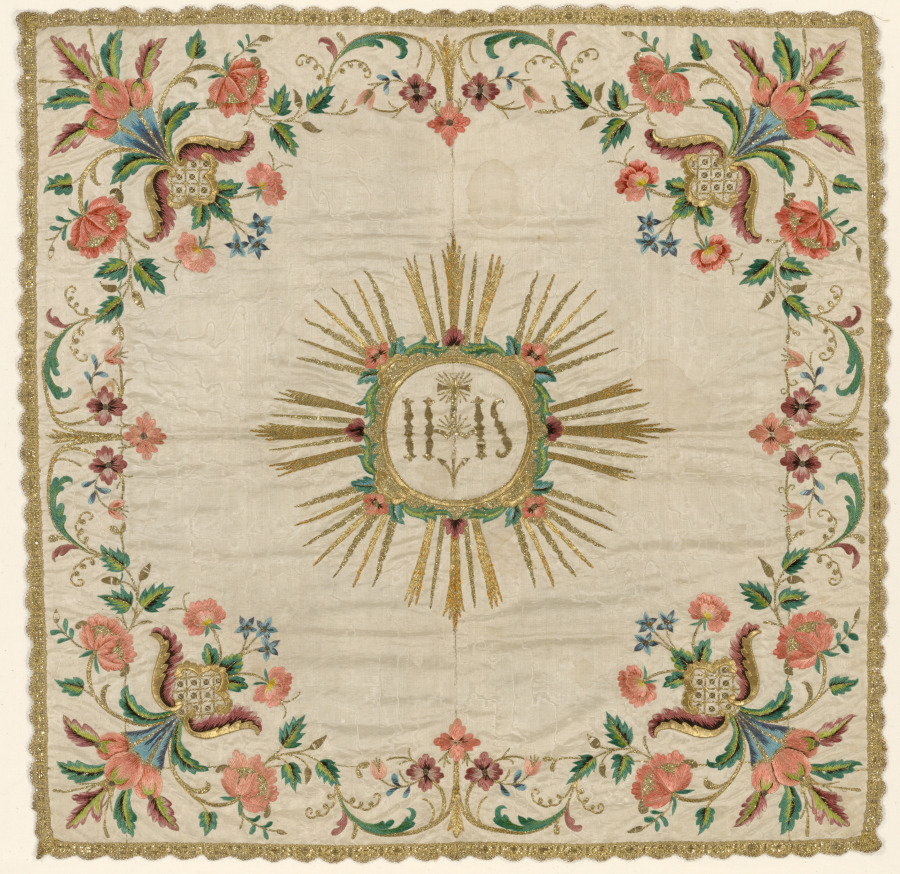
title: Chalice Veil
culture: Italy, 18th century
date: 1700s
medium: embroidery, silk and gold thread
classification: Embroidery